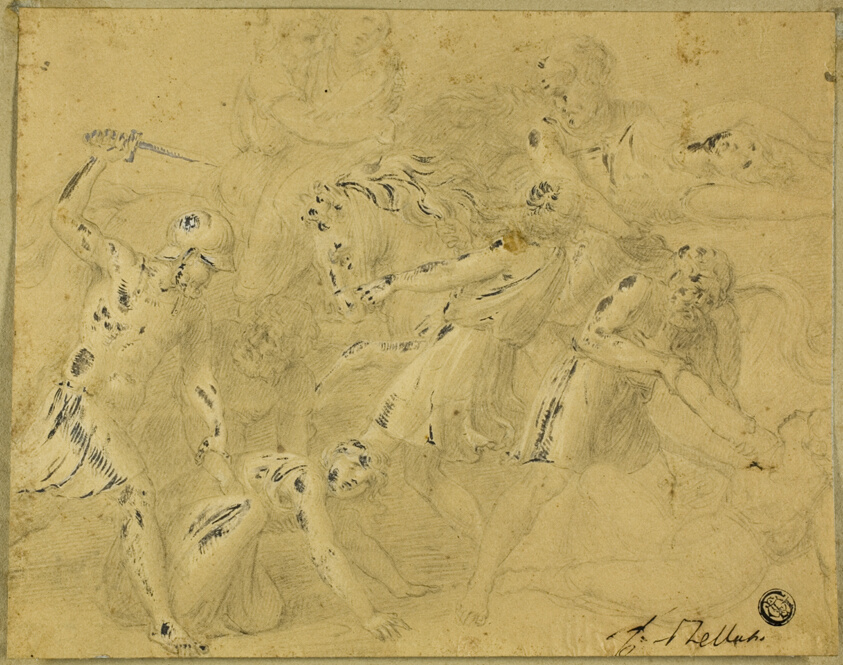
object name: Drawing and Watercolor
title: Rape of the Sabines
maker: Unknown artist (European, 18th century)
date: 18th century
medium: Black chalk, heightened with lead white (discolored), on tan wove paper, tipped on blue laid paper, tipped on tan wove paper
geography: Europe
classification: chalk; drawings (visual works); prints and drawing